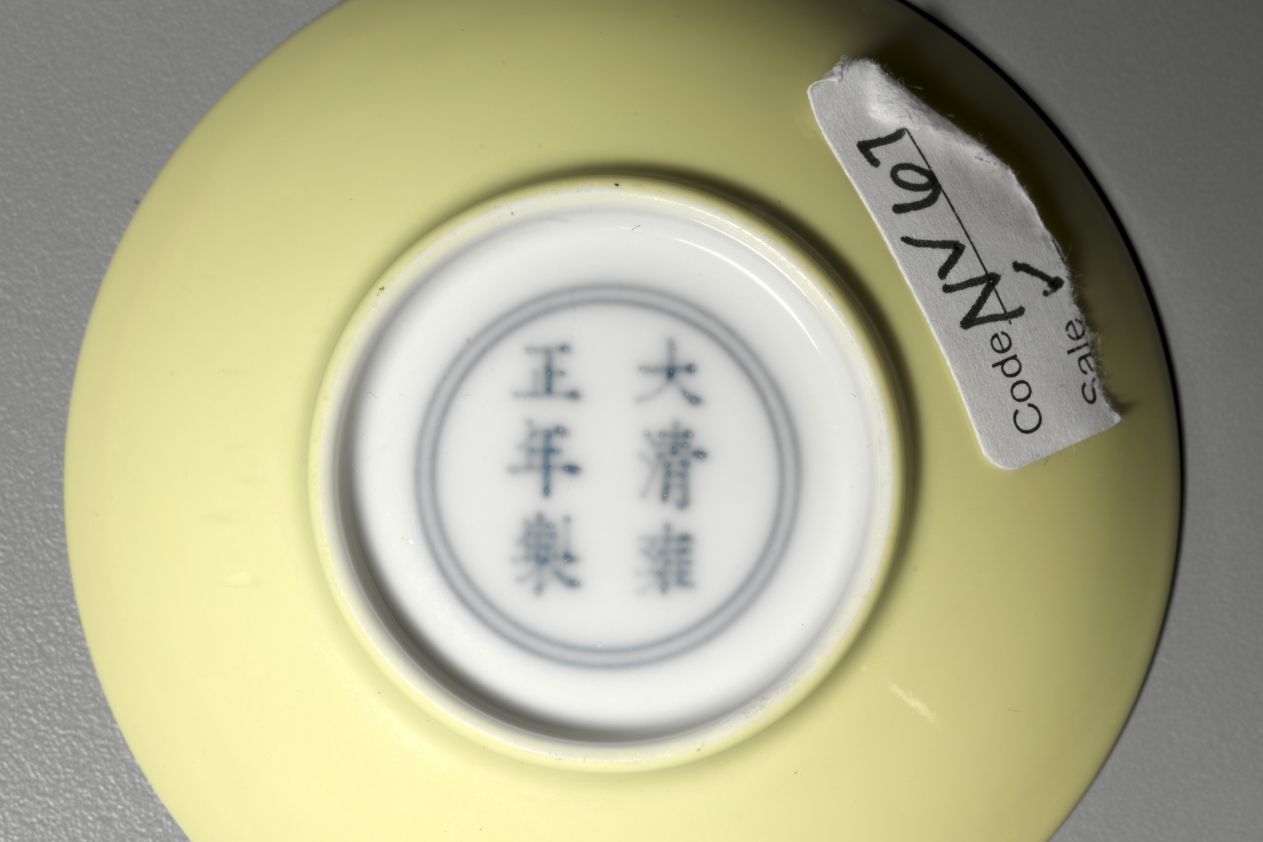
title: Small Dish with Yellow Monochrome Glaze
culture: China, Qing dynasty (1644-1911), Yongzheng mark and reign (1723-35)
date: 1723–35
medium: enameled porcelain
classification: Ceramic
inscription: 大清雍正年制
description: In the Qing dynasty (1644–1911), luxury items became more affordable to larger parts of the society, including women, merchants, and literati in non-official positions. Imperial patronage and a growing urban population encouraged consumption of luxury goods and local craftmanship. This enameled porcelain illustrates the the Qing dynasty accomplishments in porcelain techniques and the creative mind of the talented artisans who sought clients on a competitive market.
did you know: This monochromatic yellow dish was made for the imperial household.